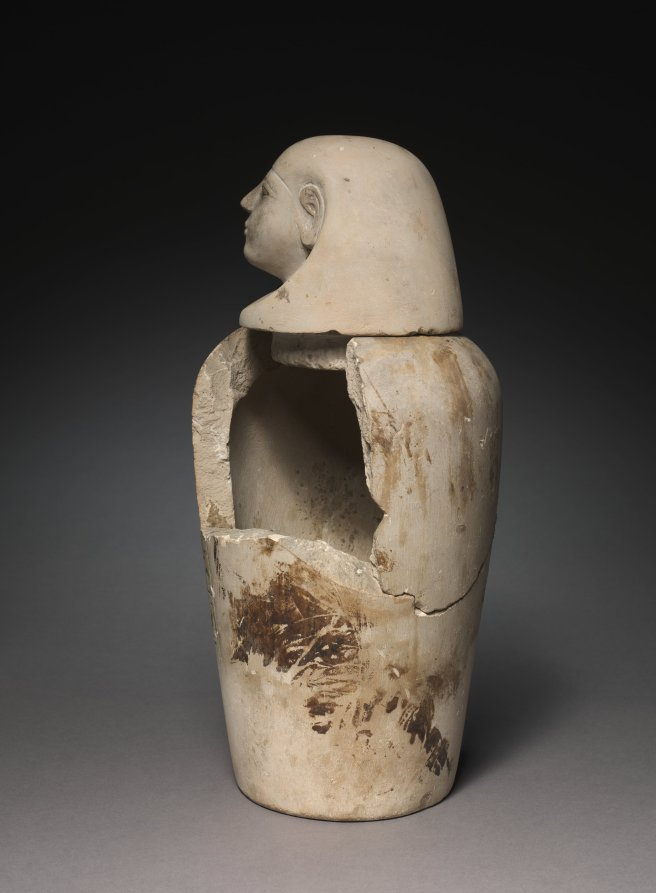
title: Canopic Jar with Lid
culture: Egypt, New Kingdom (1540–1069 BCE), Dynasty 18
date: 1540–1296 BCE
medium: limestone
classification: Funerary Equipment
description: In the process of mummification certain organs, the liver, lungs, stomach, and intestines, were removed, embalmed separately , and stored in jars known as canopic jars. Although this jar and another from the collection (1914.630) were presumably from the same individual and therefore the same set, they differ in their materials, workmanship, size, and style of inscriptions. Made of a different limestone this jar, the smaller of the two, has a lid in the form of a rather ludicrous male head. It is clearly by another hand. A sizable fragment is lost from the body. IN contrast to the poor quality of the head, the handsome inscription on the body is deeply cut and filled in with a blue pigment. It reads, "[Words spoken by Nephathys:] 'May your arms embrace that which is in you. May you protect Hapy, who is in you, and the honored one before Hapy, the Osiris, the royal herald, Gregmennefer, vindicated."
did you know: Canopic jars are named after the Greek sailor Canopus, who was said to be buried at Canopus (Abuqir) in the western delta and worshipped there in the form of a human-headed jar. It was actually a form of Osiris and had nothing to do with internal organs, but the term has stuck.